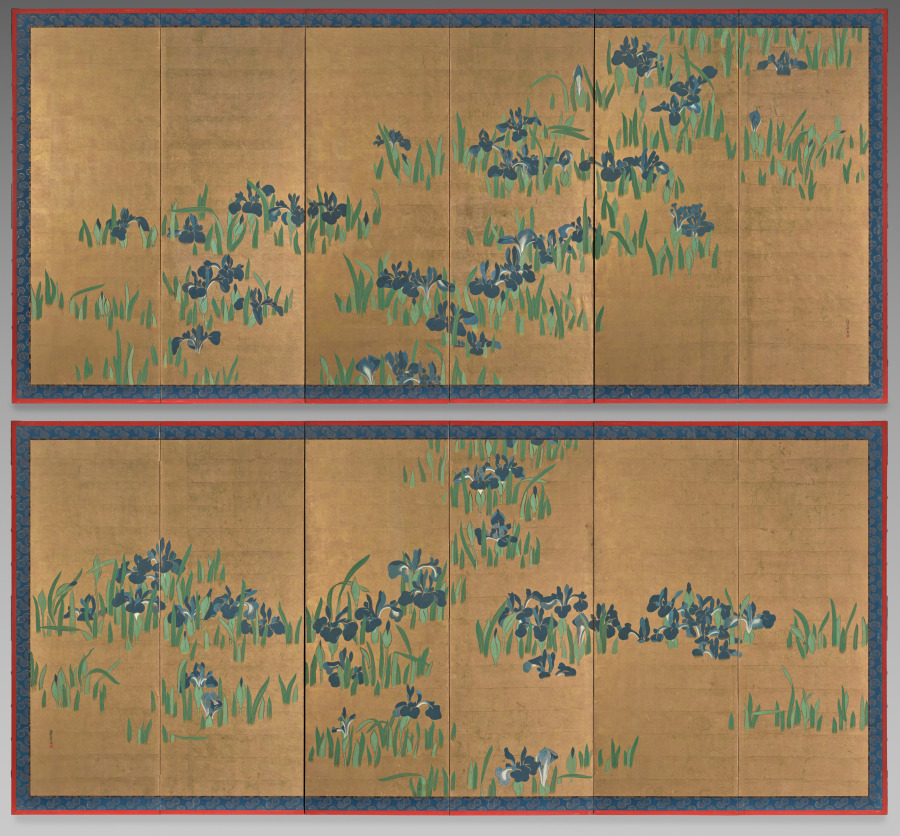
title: Irises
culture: Japan, Edo period (1615–1868)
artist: Watanabe Shikō (Japanese, 1683–1755)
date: 1700s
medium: pair of six-panel folding screens, ink and color on gilded paper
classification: Painting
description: The subject of this painting comes from a 10th-century text. It tells of a young nobleman’s journey into the lonely countryside, far from the capital city of Heian-kyō (Kyoto). There he came upon a small stream, the banks of which were covered with blooming irises, on which the artist has chosen to focus our attention. While viewing the beautiful flowers the nobleman composed a poem: I have a beloved wife, Familiar as the skirt of a well-worn robe, And so this distant journeying Fills my heart with grief.